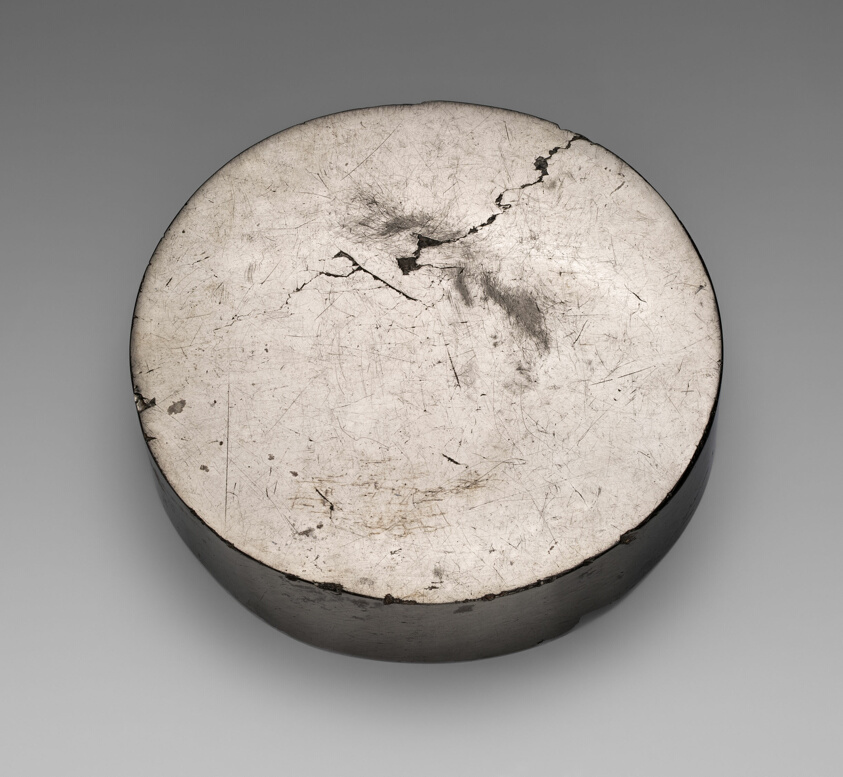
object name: Religious/Ritual Object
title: Divination Mirror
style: chavín horizon, cupisnique, early horizon, Pre-Columbian, americas, andes, Arts of the Americas, andean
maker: Chavín-Cupisnique; North coast, Peru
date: 900–600 BCE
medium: Anthracite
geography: Peruvian North Coast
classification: ritual objects; ceremonial object; art of the americas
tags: mirrors, ritual objects